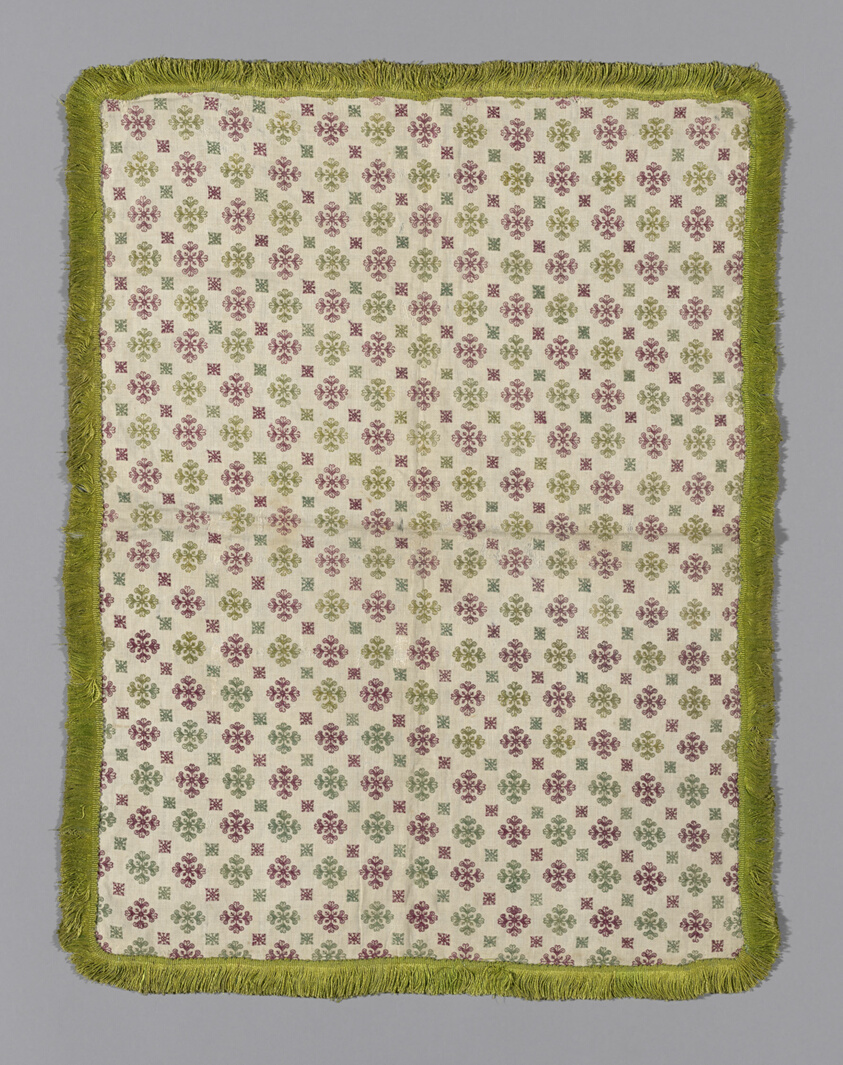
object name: Textile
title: Cover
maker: Italy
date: 1625/1775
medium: Linen, plain weave; embroidered in silk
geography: Italy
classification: textile; needlework (visual works)